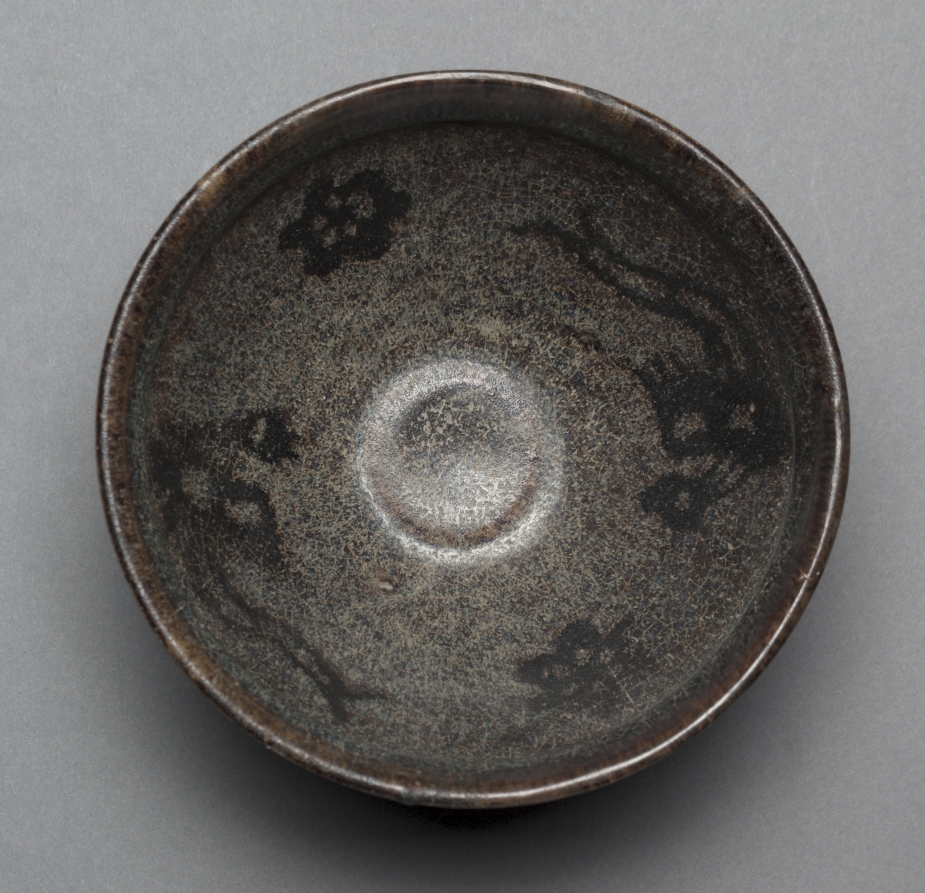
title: Tea Bowl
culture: China, Jiangxi province, Southern Song dynasty (1127-1279)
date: 1127–1279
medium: buff stoneware with iron brown glaze and paper-cut decoration, Jizhou ware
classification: Ceramic